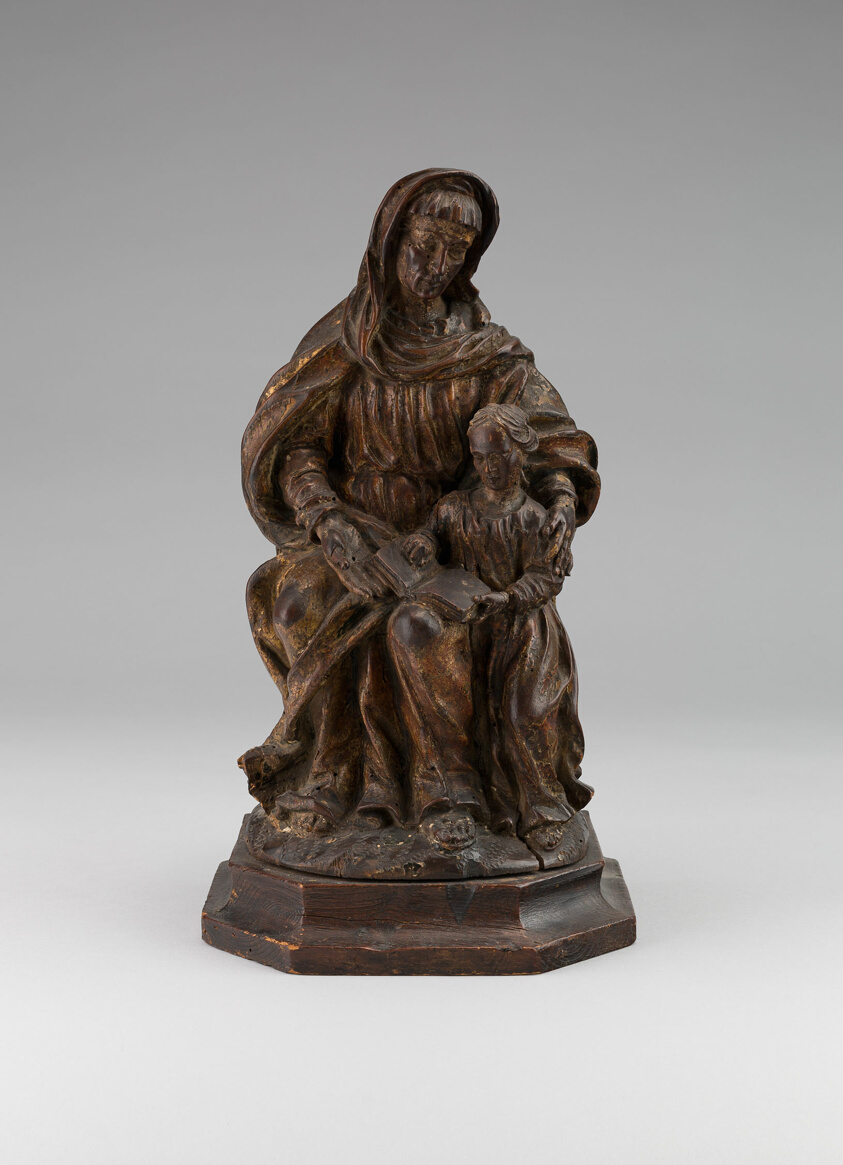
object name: Sculpture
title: The Education of the Virgin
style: sixteenth century, 16th Century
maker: German; Rhenish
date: c. 1580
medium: Wood, traces of original gilding and polychromy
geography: Germany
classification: statuette; sculpture; german; paint; wood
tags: Virgin Mary, woman with children, Devotion, Christianity, Christian subjects, religious figures, religious, religion, reading, education, book, child, woman